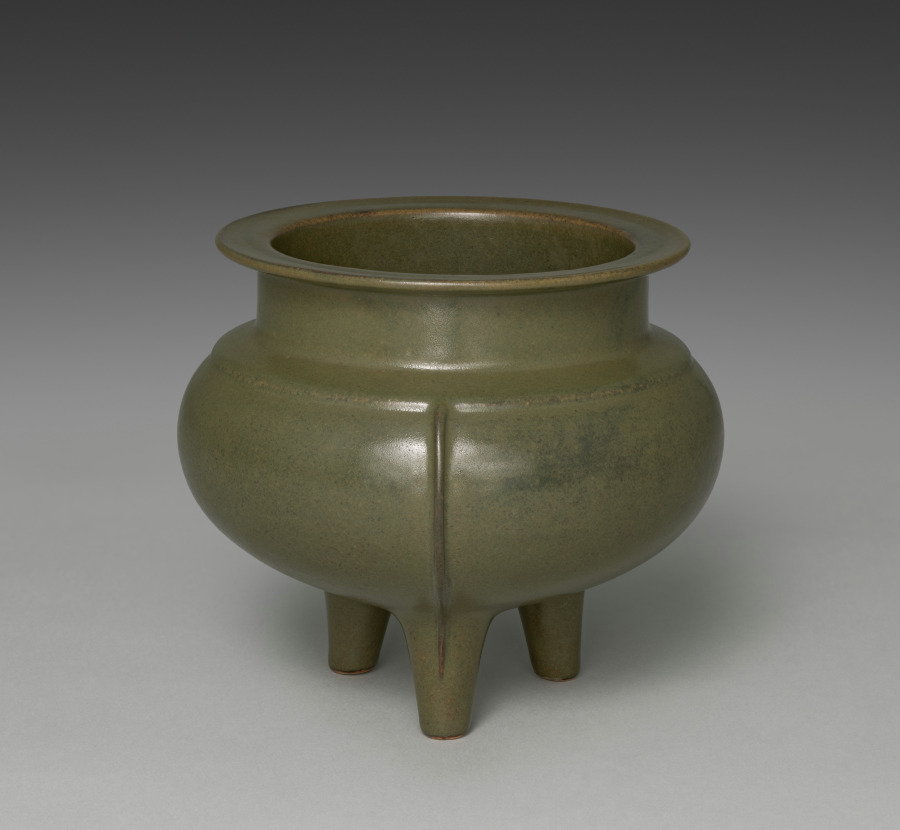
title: Incense Burner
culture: Japan, Meiji period (1868–1912)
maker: Seifū Yohei III (Japanese, 1851–1914)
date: 1895–1914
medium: Porcelain with tea-leaf colored glaze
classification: Ceramic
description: Kyoto-based Japanese ceramist Seifū Yohei III (1851–1914) admired the glaze colors found on Chinese porcelain and tried to replicate them through intensive experimentation. His green and creamy white glazes were particularly well received. The combinations of colors with subtle molded and incised decorations in his ceramics respond powerfully to changes in light, creating a dynamic viewing experience. Names for the glazes, written in ink with a brush on the lids of the custom-made storage boxes for the works, often indicate a specific glaze or ware that had inspired him, even when the resulting color was distinctively his own.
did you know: This globular incense burner has a tea leaf colored glaze and linear molded decorations running around the base of the collar and down the legs.